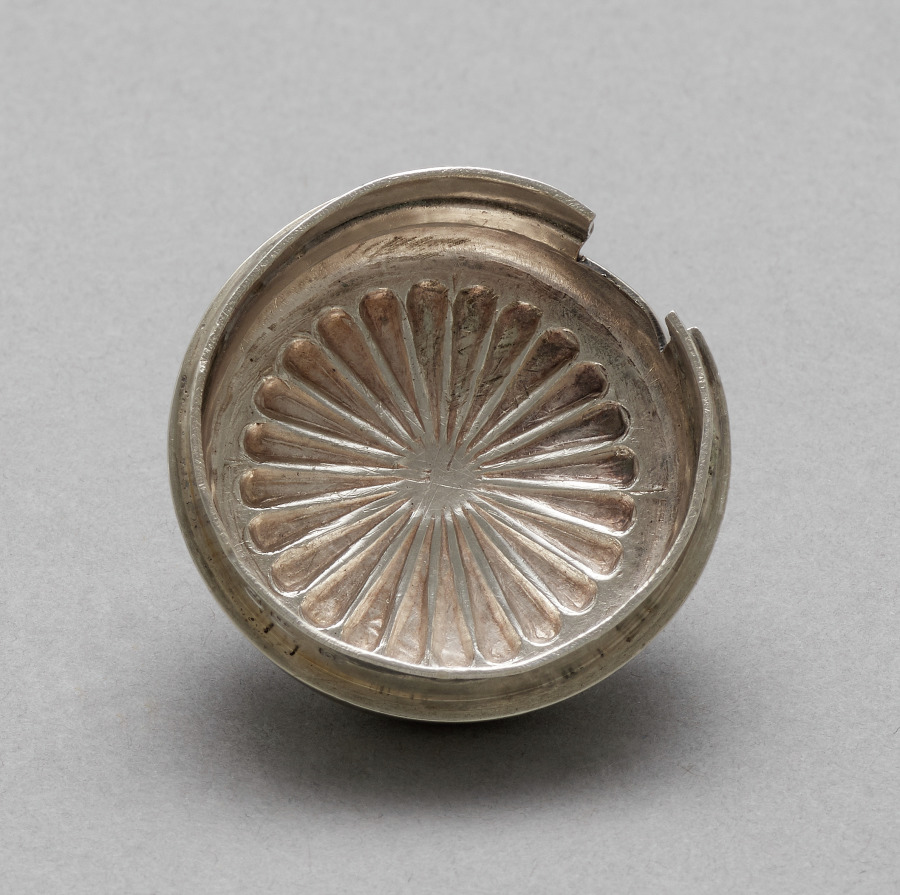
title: Pot (cover)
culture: England, 19th century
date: 1817–18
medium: silver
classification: Silver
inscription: Stamped on lid: "PS", Lion Passant, "b".